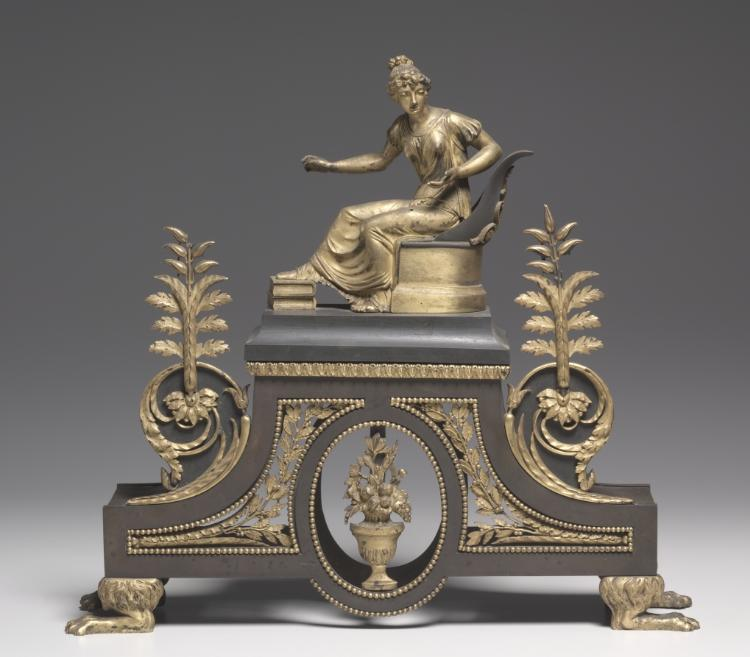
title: Firedog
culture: France, 18th century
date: c. 1790–1800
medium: bronze and gilded bronze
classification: Furniture and woodwork